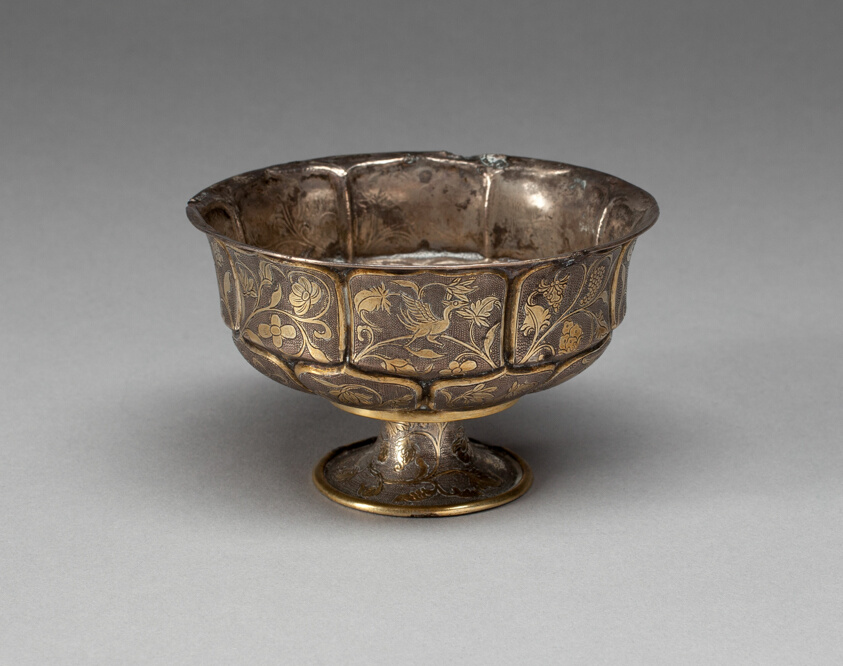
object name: Decorative Arts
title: Stem Cup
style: Chinese (culture or style)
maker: China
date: Tang dynasty (618–907), 9th century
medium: Silver with parcel gilt decoration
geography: China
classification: drinking vessel; silver; metalwork; asian art; decorative arts